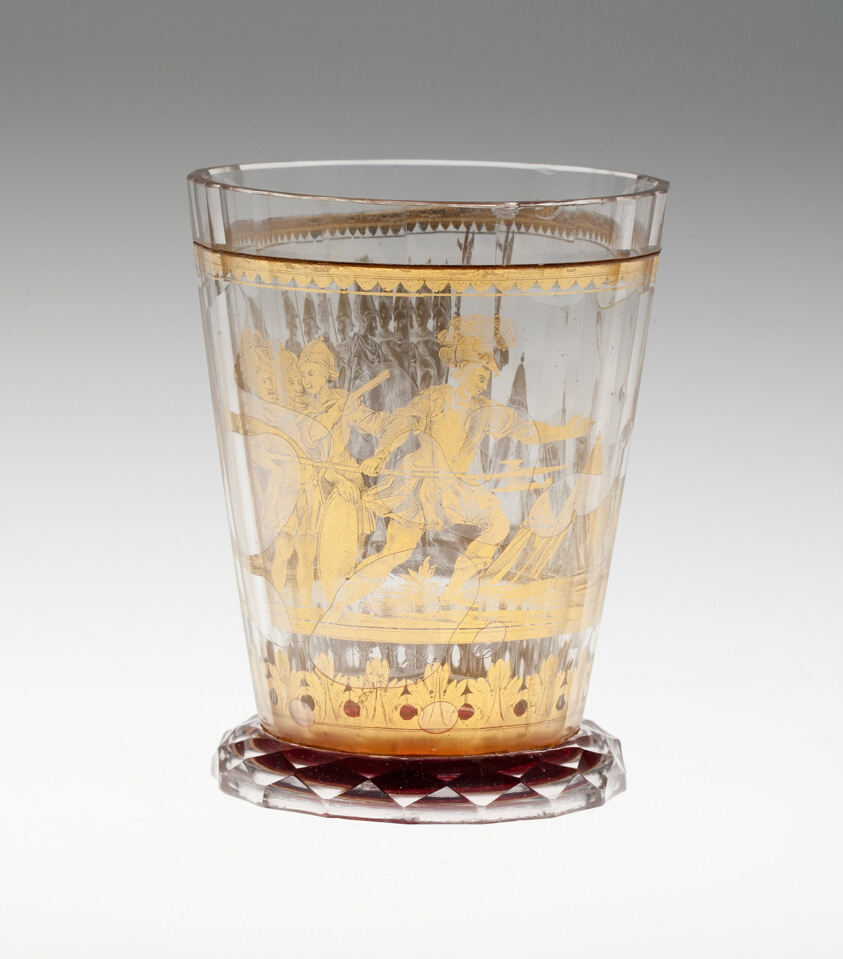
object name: Glass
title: Beaker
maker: Bohemia, Czech Republic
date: c. 1730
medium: Glass with engraved gold leaf decoration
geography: Bohemia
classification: drinking vessel; glass; european decorative arts